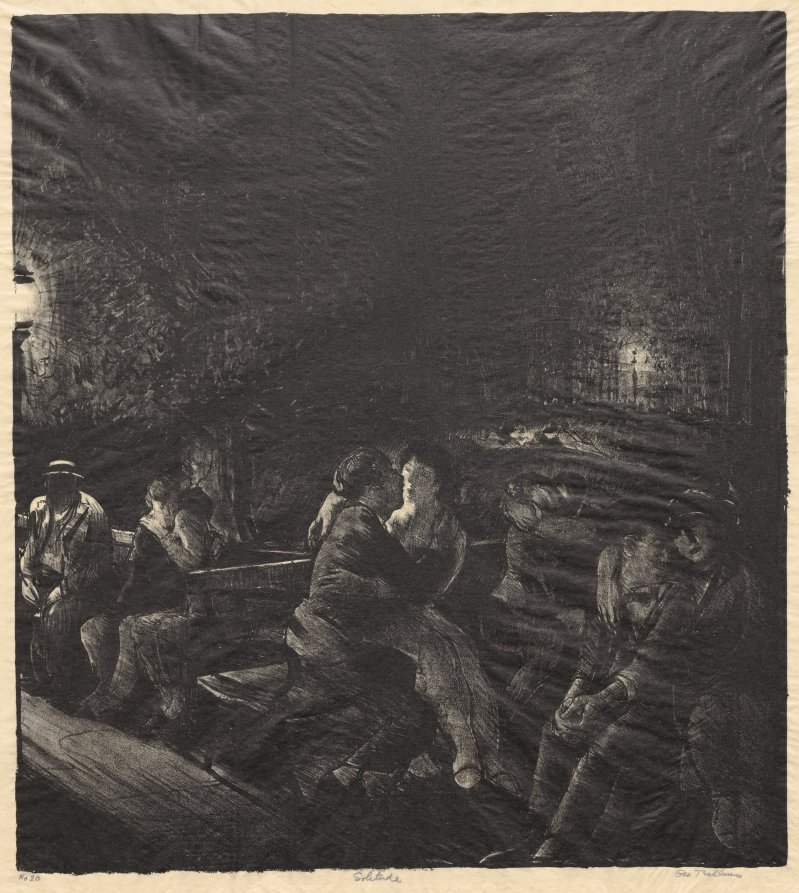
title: Solitude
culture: America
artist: George Bellows (American, 1882–1925)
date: 1917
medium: lithograph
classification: Print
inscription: In graphite, lower left, recto: "No 20"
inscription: In graphite, center, recto: "Solitude"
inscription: In graphite, lower right, recto: "Geo. Bellows"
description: In addition to leisure and recreation, city parks provided a place where couples could spend time together away from families and crowded apartments. Emphasizing the murky black of the night, George Bellows used tusche, a greasy ink, layered over lithographic crayon to create the mood of this print of park benches full of couples too absorbed in each other to notice anyone around them. A solitary man along the left edge is both physically and psychologically isolated from the others. Bellows often placed observers in his prints to suggest a connection between them and the viewer.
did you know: The benches in this image are a specific type called the “Central Park settee.”